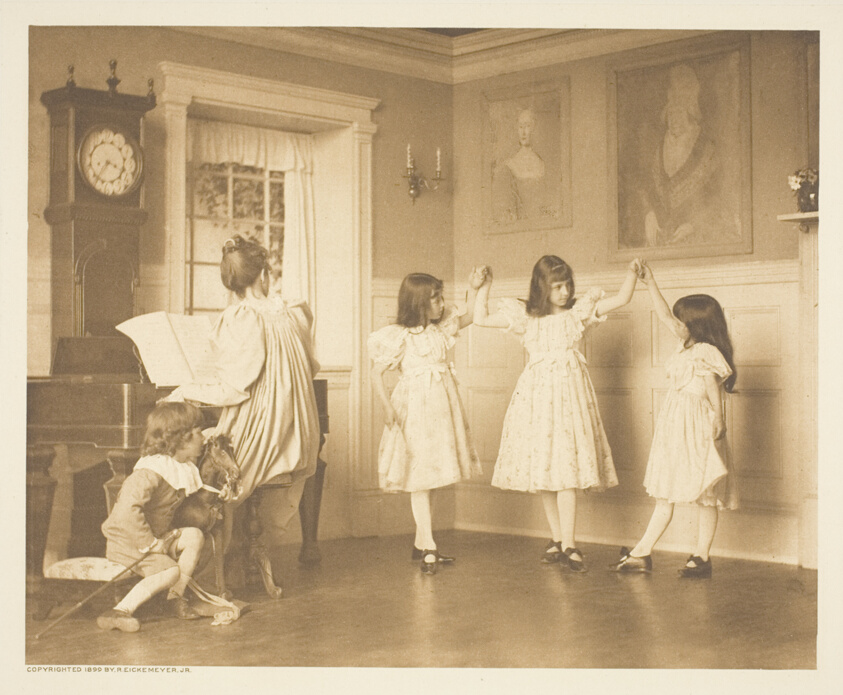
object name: Photograph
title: The Dance, No. 7 from the portfolio "American Pictorial Photography, Series II” (1901); edition 34/150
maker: Rudolf Eickemeyer, Jr. (American, 1862–1932)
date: 1899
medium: Photogravure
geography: United States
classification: photogravure; photomechanical process; photography; photograph